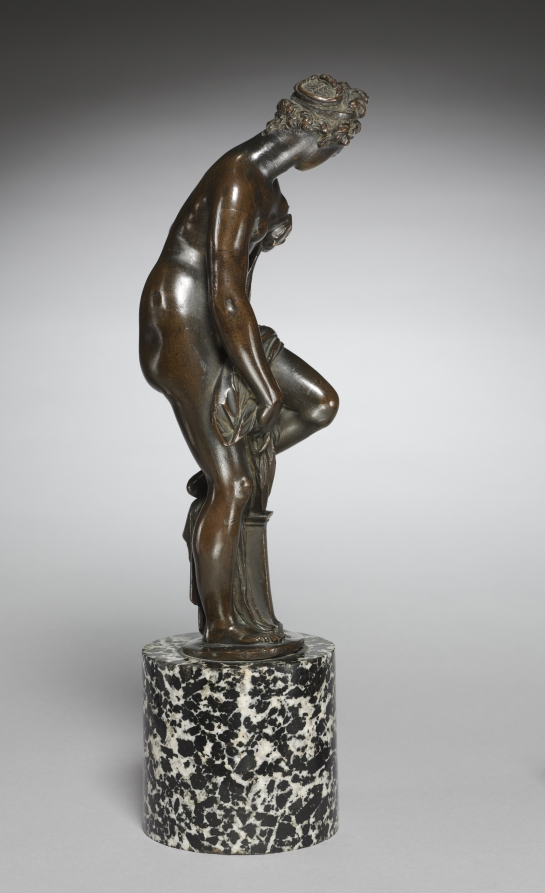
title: Venus after the Bath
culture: Italy, early 17th century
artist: cast possibly by the Workshop of Giambologna (Flemish, active Italy, 1529–1608)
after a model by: Giambologna (Flemish, active Italy, 1529–1608)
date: c. 1600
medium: bronze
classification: Sculpture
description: The statuette’s scale speaks to its likely place in private, intimate settings. The serpentine composition would have encouraged close examination from multiple angles. Compare the complexity of her pose to the relatively static Venus with a Burning Urn (1948.171).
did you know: Giambologna intended his bronze statuettes to be held and touched, to fully appreciate their smooth, elegant forms.